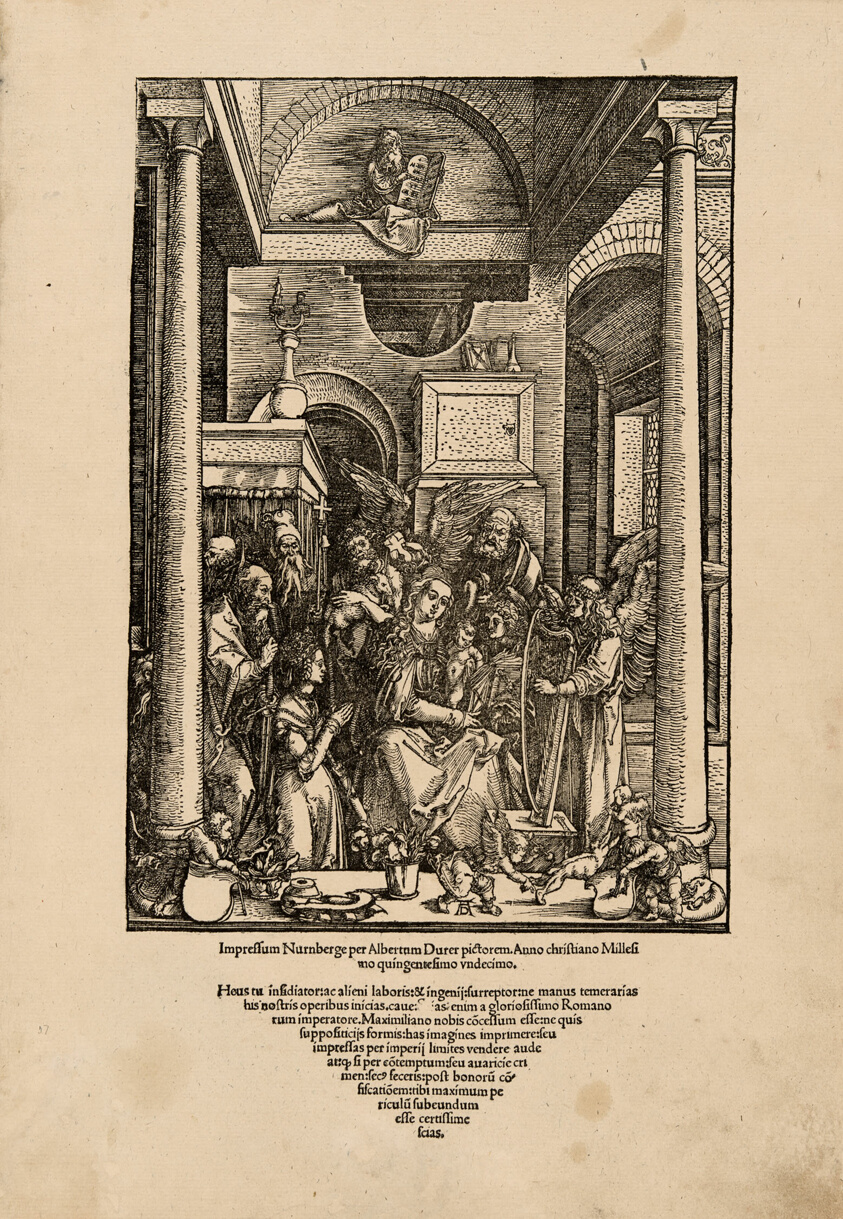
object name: Print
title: Glorification of the Virgin, from The Life of the Virgin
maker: Albrecht Dürer (German, 1471-1528)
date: c. 1502, published 1511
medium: Woodcut in black on tan laid paper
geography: Germany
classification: woodcut; print; prints and drawing; paper